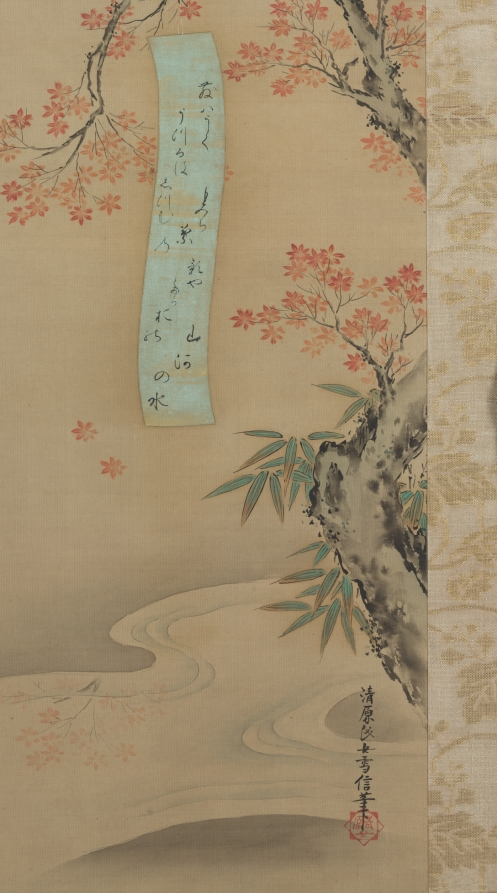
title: Autumn in Takao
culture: Japan, Edo period (1615–1868)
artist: Kiyohara Yukinobu (Japanese, 1643–1682)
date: late 1600s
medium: hanging scroll; ink and color on silk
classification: Painting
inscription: 款記「清原氏女雪信筆」/「清原女」朱文八角印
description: Kiyohara Yukinobu, a native of Kyoto, studied with Kano Tan'yū (1602–1674), the artist-in-residence to the shogun (military ruler) whose official residence was in Edo (Tokyo). Tan'yū traveled extensively because he bore responsibility for the decorative schema and large mural painting programs of the shogunal castles and residences in Nagoya and Kyoto. These were very large projects, requiring the services of legions of craftsmen, including Tan'yū's painting studio. Following her apprenticeship with Tan'yū, Kiyohara established her own career, which featured classical literary themes of the Heian era (10th–12th centuries). This image is set in autumn, and the poem card attached to the maple tree likely signifies the passage of a love affair. Takao is a popular scenic area in the mountains north of Kyoto, where autumn and spring foliage attracts many visitors.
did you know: Kiyohara Yukinobu was one of Japan's earliest and most talented female painters.